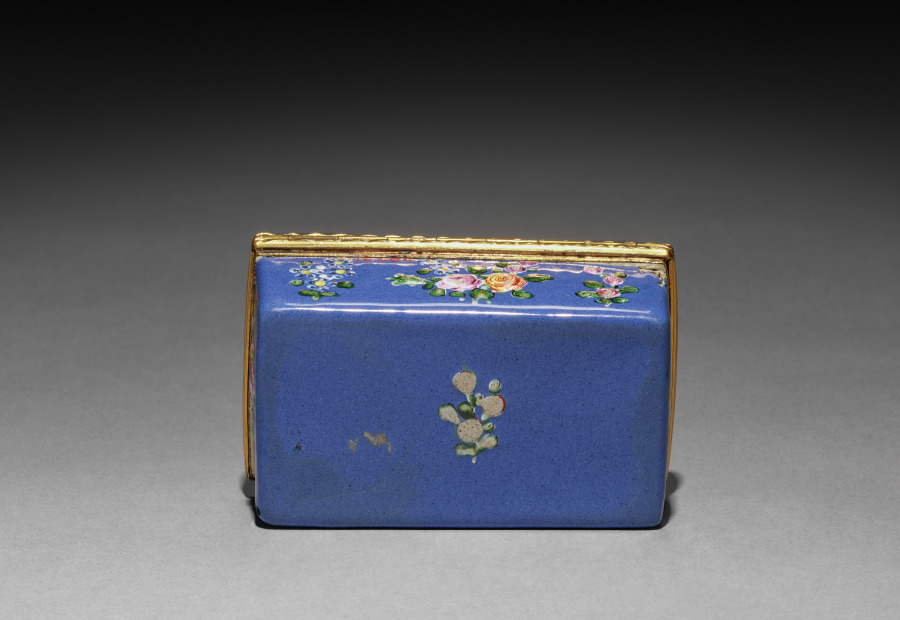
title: Snuff Box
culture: Germany ?, 19th century (?)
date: 1800s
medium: enamel on copper with metal mounts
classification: Miscellaneous